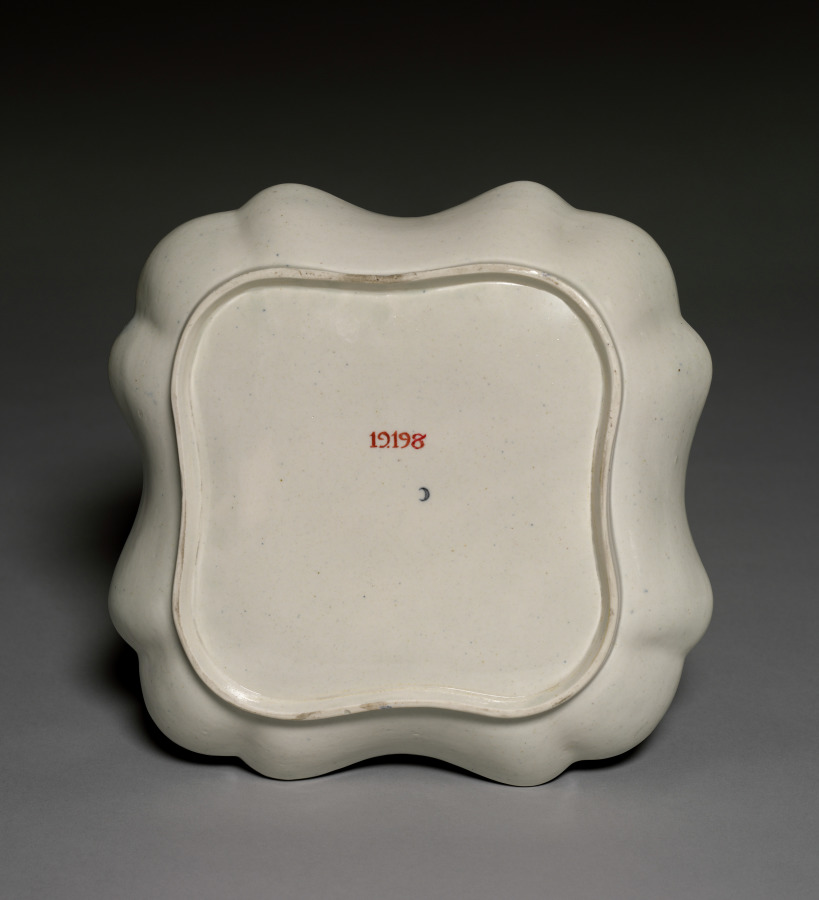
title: Square Dish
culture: England, 19th century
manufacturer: Worcester Porcelain Factory (British, established 1751)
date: c. 1773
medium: porcelain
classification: Ceramic